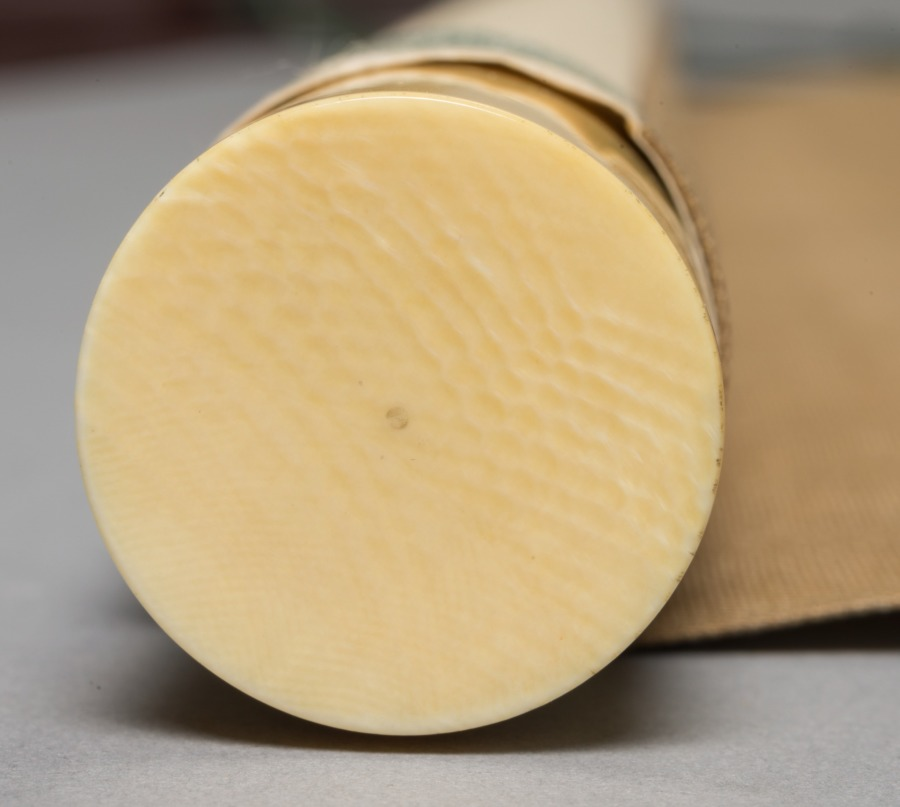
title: Hotei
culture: Japan, Muromachi period (1392–1573)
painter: Yamada Dōan I (Juntei) (Japanese, d. 1573)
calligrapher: Tōkei Jakurin (Japanese, dates unknown)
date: mid-1500s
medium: hanging scroll; ink on paper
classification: Painting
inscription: 桃渓道人 題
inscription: 大肚兮濶襟 寶聚嚢底沵 通霄別有路 勿向指尖尋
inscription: 落款 桃渓之印 若霖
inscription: 印章 山田氏道安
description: Hotei is a semilegendary figure who may have lived from the late 800s to the early 900s. He later became prominent in Chan (or Zen, in Japanese) Buddhist literature. He epitomizes the freewheeling figure outside the mainstream monastic system—in which people strive for enlightenment through prescribed methods—who nonetheless attains a high level of spiritual awakening. The inscription warns against seeking enlightenment by conscious effort: Big stomach, gaping garment, Treasures gathered deep in the bottom of his bag, Passing through the sky is another road, Do not seek that to which his fingertip points.